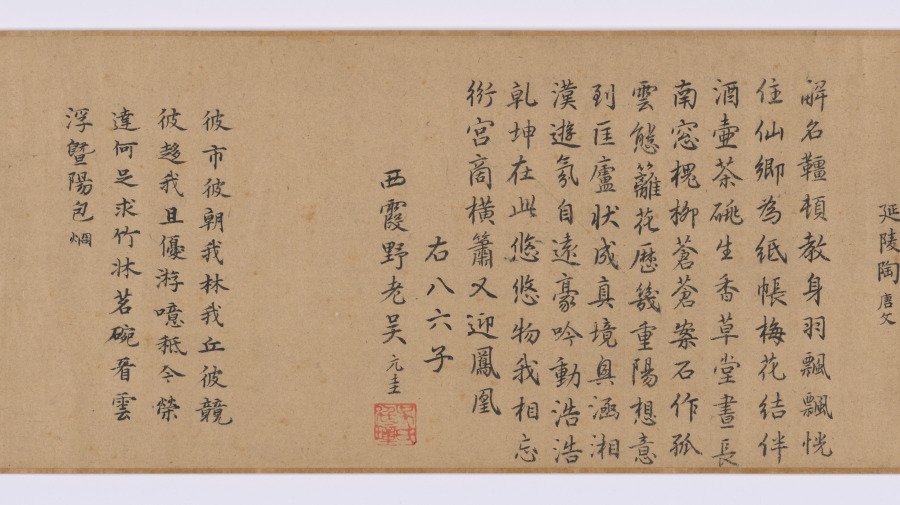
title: Leisure Enough to Spare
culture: China, Yuan dynasty (1271-1368)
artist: Yao Tingmei (Chinese, active mid-1300s)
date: 1360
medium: handscroll, ink on paper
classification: Painting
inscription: 至正廿年春正月_日作此併系鄙語于尾 地偏人遠閉柴關，滿院松陰白晝閒。 眼底風塵渾忘却，坐看流水臥看山。 吳興姚廷美畫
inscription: 23 colophons and 53 seals (dates unavailable for some): 1 colophon, dated 1360, and 2 seals of Yang Weizhen (1296-1370); 1 colophon and 3 seals of Wan Yi; 1 colophon of Zhang Junde; 1 colophon and 3 seals of Angji (act. ca. mid-14th c.); 1 colophon and 1 seal of Xu Shiquan; 1 colophon and 3 seals of Gao Yu; 1 colophon and 2 seals of Li Mingfu; 1 colophon and 2 seals of Lu Lin; 1 colophon and 1 seal of Zhang Qian; 1 colophon of Tao Tangwen; 1 colophon and 1 seal of Wu Yuangui (act. ca. 1300-60); 1 colophon of Bao Jiong; 1 colophon of Wang Zao; 1 colophon and 1 seal of Ma Chuyi; 1 colophon and 1 seal of Lin Yizhuang; 1 colophon and 1 seal of Gu Shunju; 1 colophon and 2 seals of Wang Jing; 1 colophon and 2 seals of Lin Shouchang; 1 colophon and 1 seal of Gao Zhidao; 1 colophon of Lin Xun; 1 colophon, dated 1359, and 2 seals of Meng Weicheng (act. mid-14th c.); 1 colophon and 1 seal of Meng Zhiji (act. mid-l4th c.); 14 seals of Liang Qingbiao 梁清標 (1620-1691); 1 poem dated 1755 and 5 seals of the Qianlong 乾隆 emperor (r. 1736-95); 2 seals of the Jiaqing 嘉慶 emperor (r. 1796-1821); 3 seals of the Xuantong 宣統 emperor (r. 1909-11).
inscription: Title on frontispiece by Zhang Bi 章弼: Signed Gongchen 拱辰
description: Seclusion and leisure—the ideals of the literati, or scholar-gentlemen—are expressed in this mature work by Yao Tingmei. The theme acquired special meaning at a time of the military uprisings near the end of the Yuan dynasty. Dedicated to an ascetic named Du, this work combines painting, calligraphy, and poetry; following the painting are more than 20 poems and essays written by notable scholars, one of whom was the calligrapher Yang Weizhen. It reveals not only the aesthetic taste of the literati but also the practice of contributing artistic and literary works to fulfill social obligations. Yao's painting demonstrates his individual style derived from various ancient masters (Guo Xi, Dong Yuan, and Juran). Yang Weizhen's calligraphy exhibits his bold, vigorous style and his intent to capture the spirit of antiquity in art.